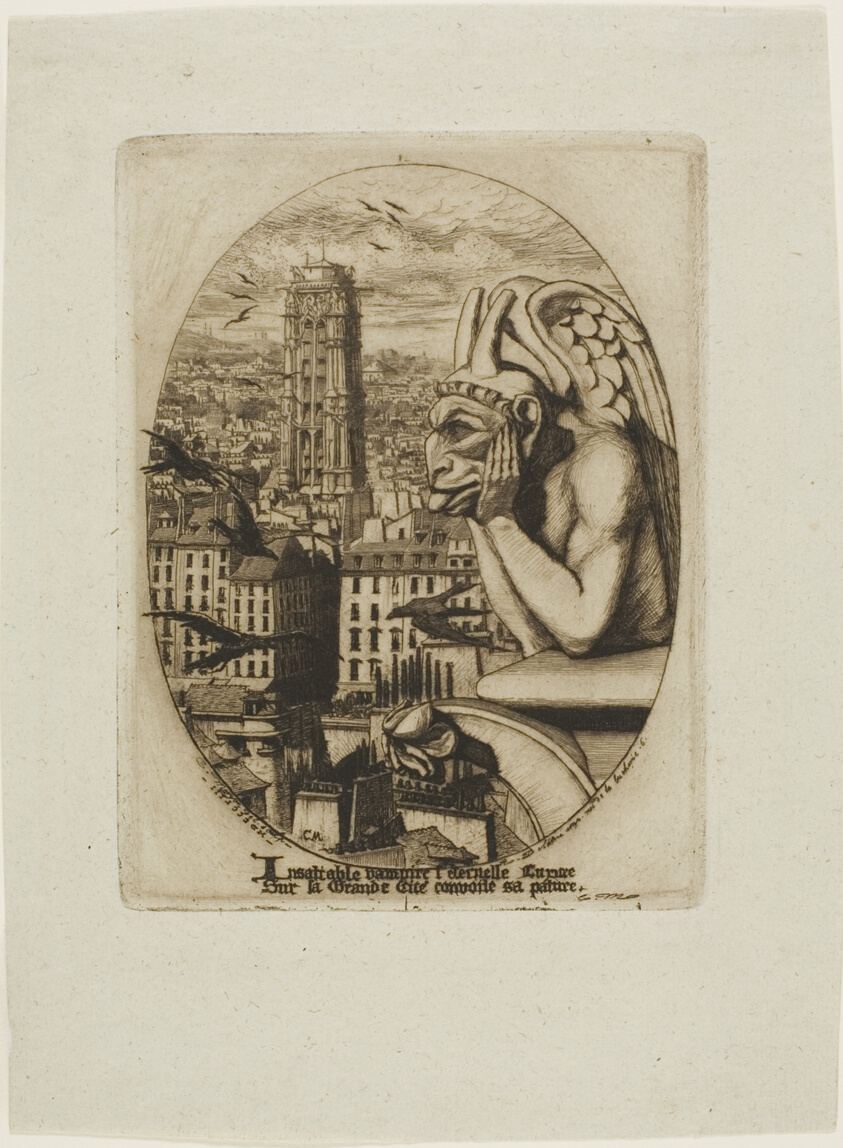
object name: Print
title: The Vampire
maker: Charles Meryon (French, 1821-1868); printed by Auguste Delâtre (French, 1822-1907)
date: 1853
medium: Etching and drypoint in dark brown on greenish-ivory laid chine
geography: France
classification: etching; print; prints and drawing